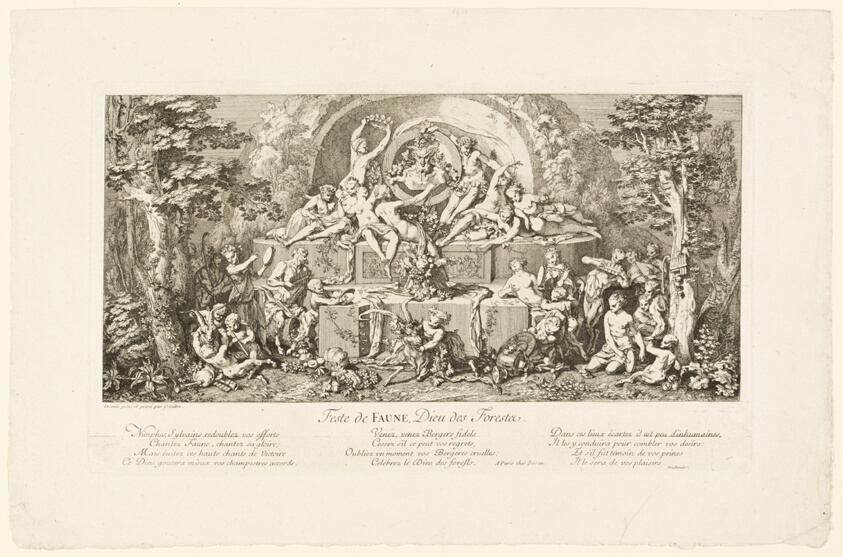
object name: Print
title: Feste de Faune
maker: Claude Gillot (French, 1673-1722)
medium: Etching on paper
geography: France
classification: etching; print; prints and drawing